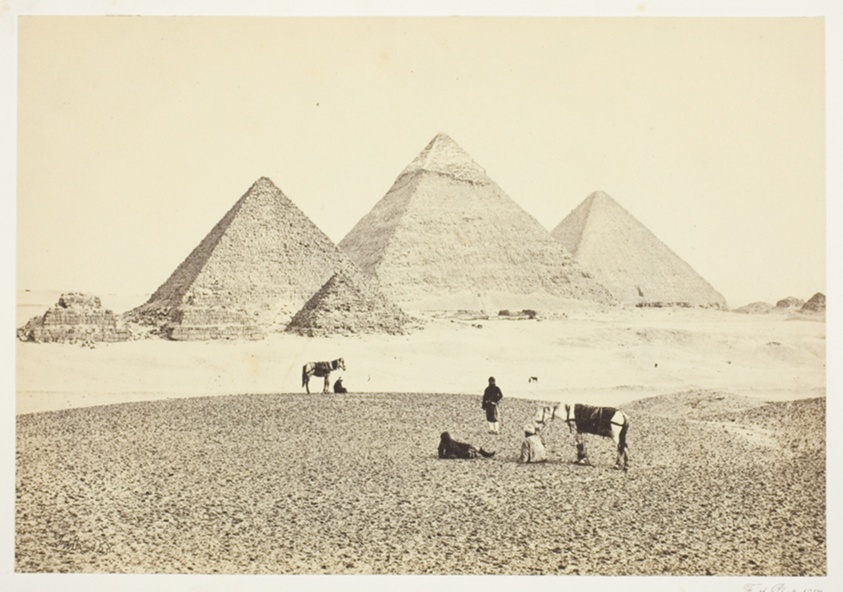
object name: Photograph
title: The Pyramids of El Geezeh, from the Southwest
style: 19th century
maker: Francis Frith (English, 1822–1898)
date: 1857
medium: Albumen print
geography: England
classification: albumen silver print; photographic process; photography; photograph